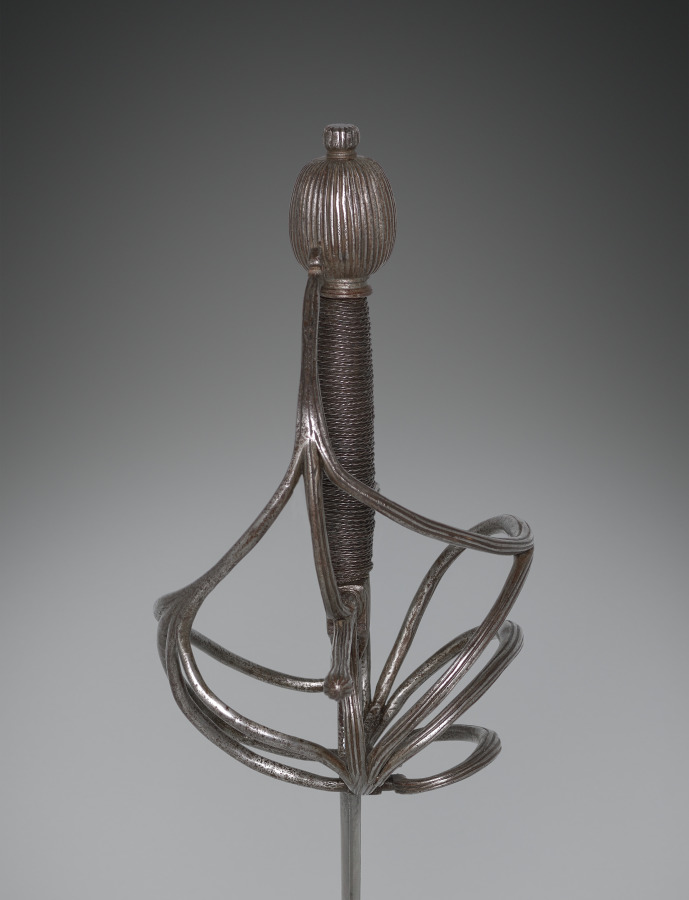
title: Rapier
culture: Blade: Spain, Toledo Hilt: Italt, Belluno?, late 16th-early 17th Century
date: c. 1580–1610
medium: steel, ribbed guard and pommel; wood and wire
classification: Arms and Armor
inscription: PIETRO HERNAN[DJEZ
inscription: three (Toledo and half-moon)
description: The rapier was a sword worn with civilian dress and used in duels. The term rapier derives from the 16th-century French word rapière, which in turn derived from the Spanish espada ropera, or “dress sword.” The rapier was a light weapon with a straight double-edged and pointed blade that, with the development of the art of fencing in the 1500s and 1600s, gradually became narrower and lighter, and thus suitable for thrusts only. With the new technique of swordplay emphasizing the point of the blade, sword guards became more complex to protect the duelist’s unarmored hand. These elaborate guards were frequently decorated by various techniques—chiseling, bluing, russeting, and damascening.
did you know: During this time fencing academies were already in existence in Milan, Venice, Verona, and Madrid, and the rules of fencing evolved with two styles dominating, the Spanish and the Italian.